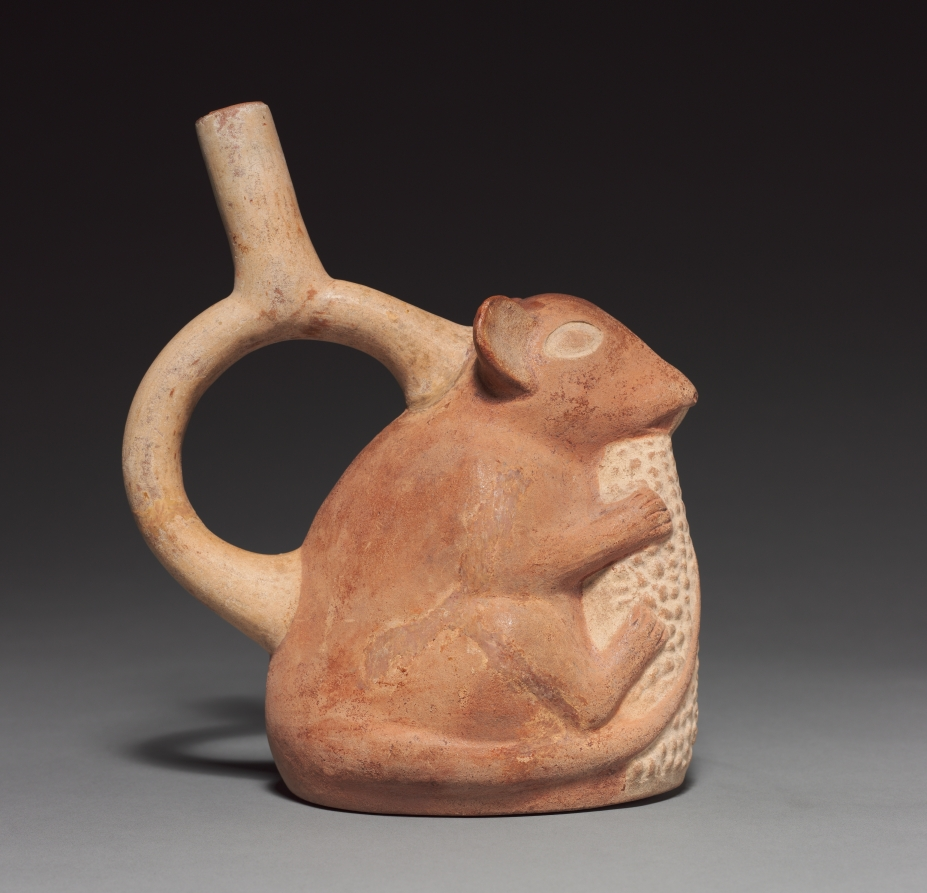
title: Rodent with Corn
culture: Peru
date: 50–800 CE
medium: pottery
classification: Ceramic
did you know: From the Moche, renowned for animal portraits, comes this rodent gnawing maize (corn).